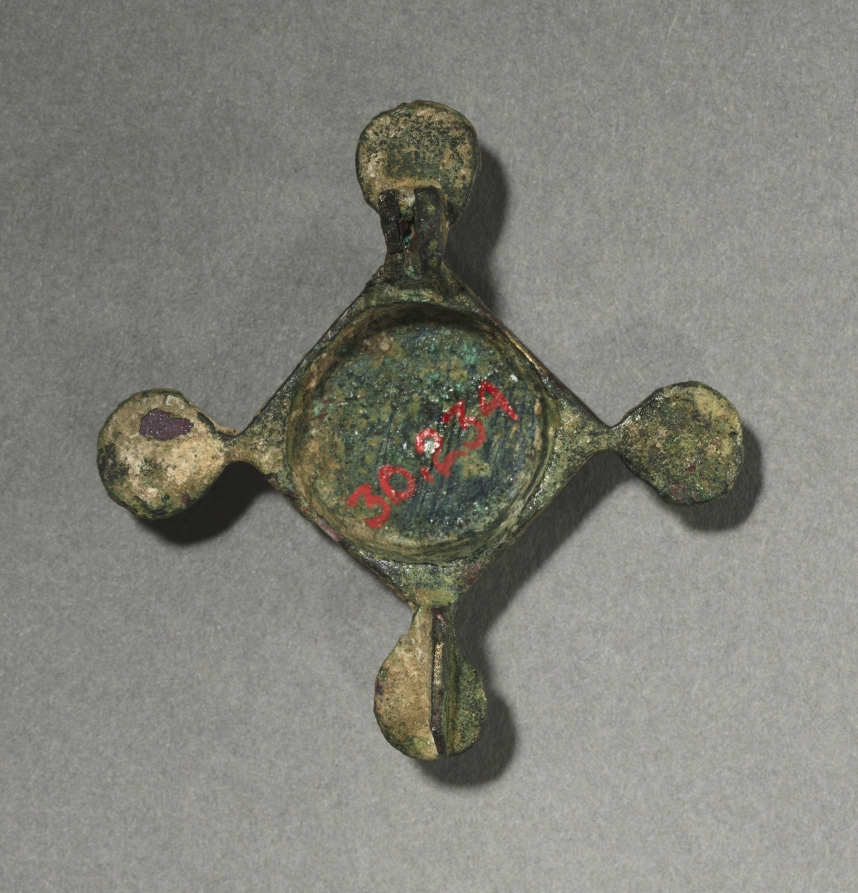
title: Ornamental Brooch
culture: Gallo-Roman or Romano-British, Migration period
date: c. 100–300 CE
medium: bronze and champlevé enamel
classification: Jewelry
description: These brooches functioned as garment clasps (much like the generally larger fibulae) and are distinctive for their decorative enamels. The art of enameling was highly popular among the conquered peoples who lived on the outskirts of the Roman empire, chiefly the Celts and the Gauls. Though the enameling technique was practiced by the Romans themselves on small objects, the brightly colored decoration readily appealed to "barbarian" taste. By the AD 200s, enameled brooches like these were being made in abundance by the native peoples of Britain and Gaul (modern France and Belgium).